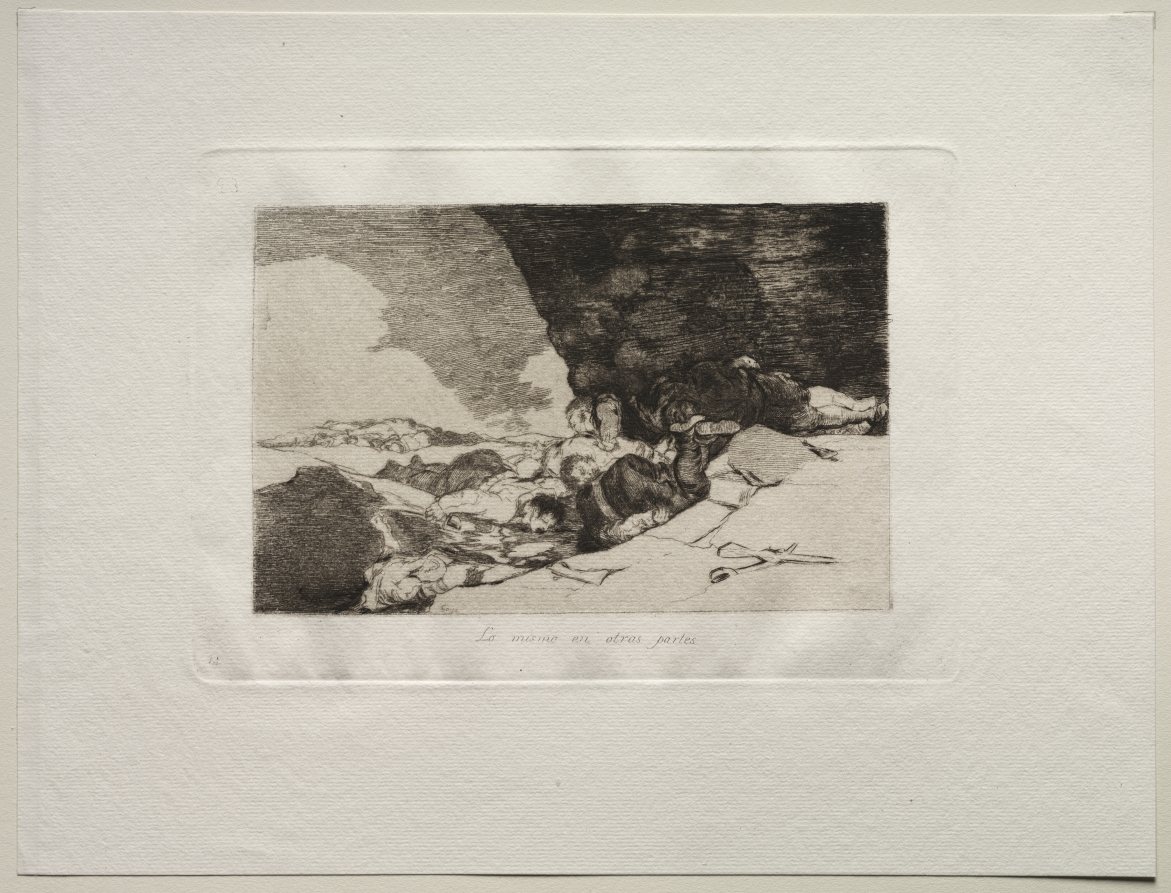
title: The Horrors of War: The Same Elsewhere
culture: Spain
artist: Francisco de Goya (Spanish, 1746–1828)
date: c. 1810–20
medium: etching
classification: Print